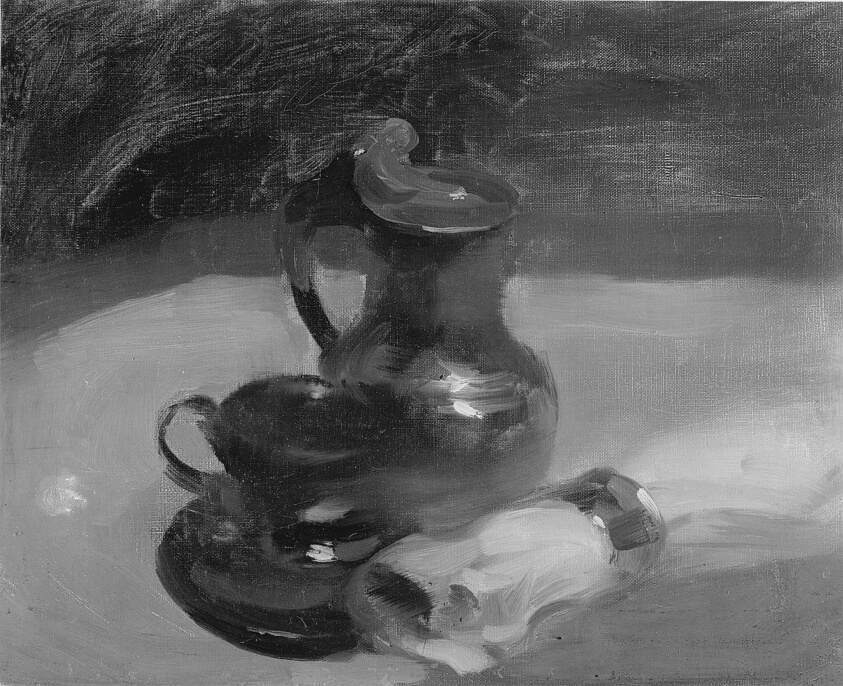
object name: Painting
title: Still Life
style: 19th century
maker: Eugène Carrière (French, 1849–1906)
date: c. 1875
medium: Oil on canvas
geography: France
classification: oil on canvas; french; oil paintings (visual works); paint; painting; european painting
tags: still life, servingware, pitcher, cup, table